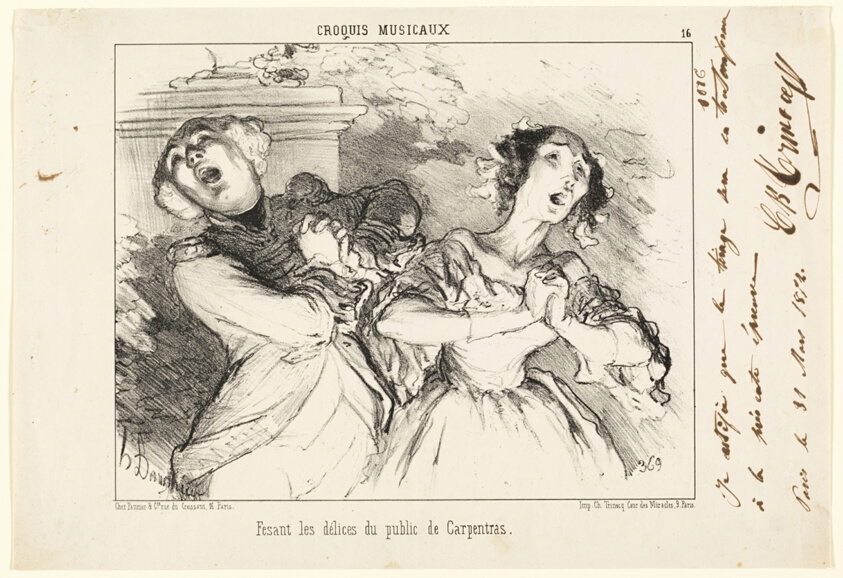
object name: Print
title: Giving the public the delights of Carpentras, plate 16 from Croquis Musicaux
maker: Honoré Victorin Daumier; French, 1808-1879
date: 1852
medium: Lithograph in black on white wove paper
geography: France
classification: lithograph; print; prints and drawing